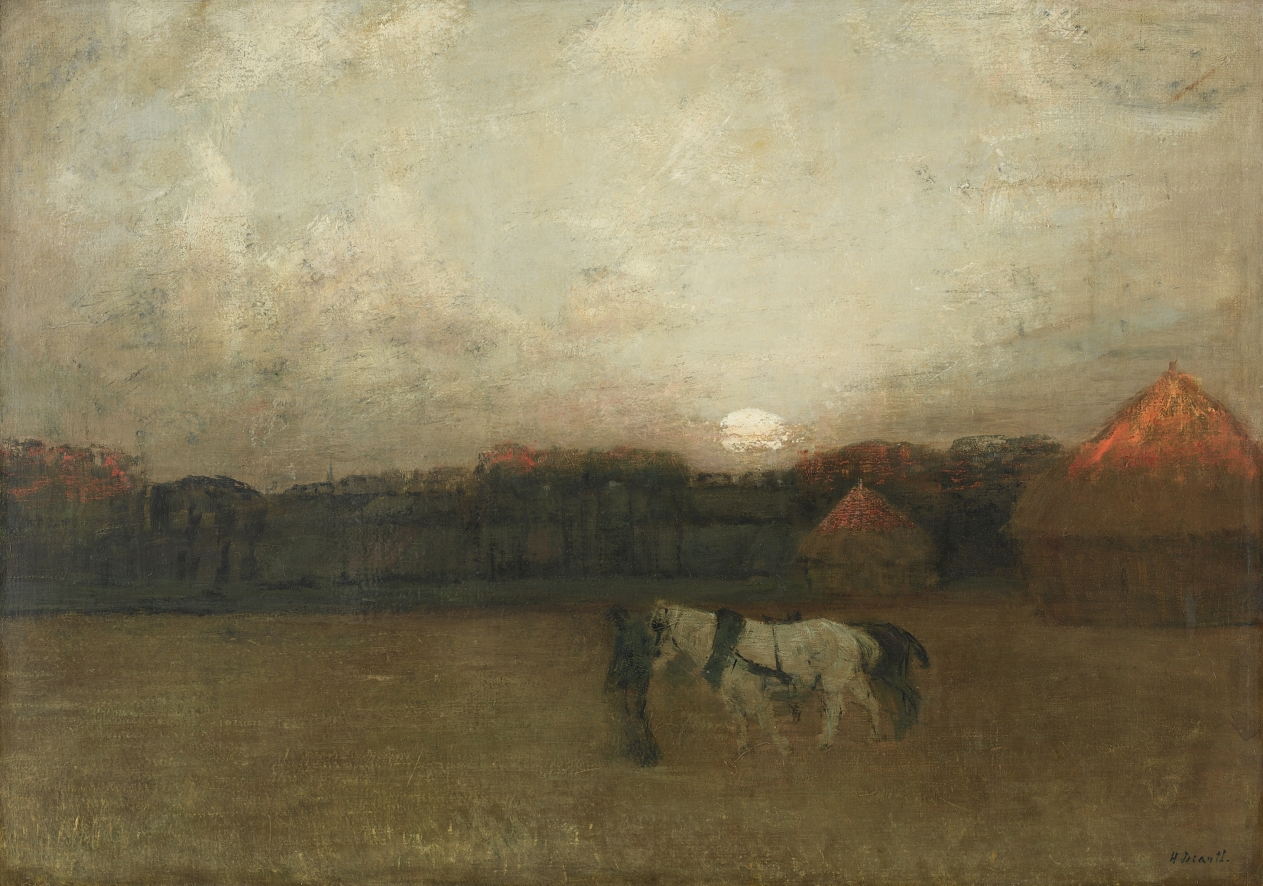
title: The Stubble Field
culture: America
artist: Henry Golden Dearth (American, 1864–1918)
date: c. 1909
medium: oil on canvas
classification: Painting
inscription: Signed lower right: H. Dearth